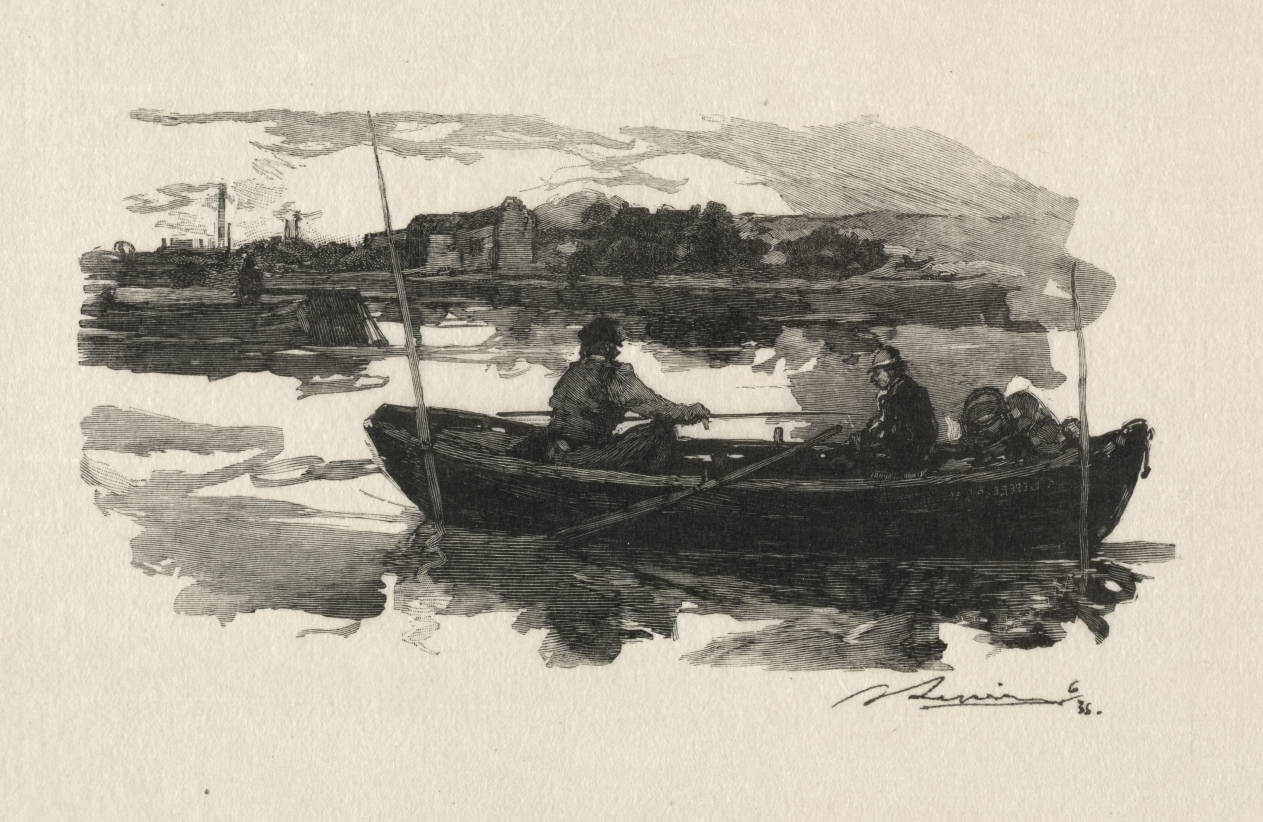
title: Au bord de la Seine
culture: France, 19th-20th century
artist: Auguste Louis Lepère (French, 1849–1918)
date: 1888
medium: wood engraving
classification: Print